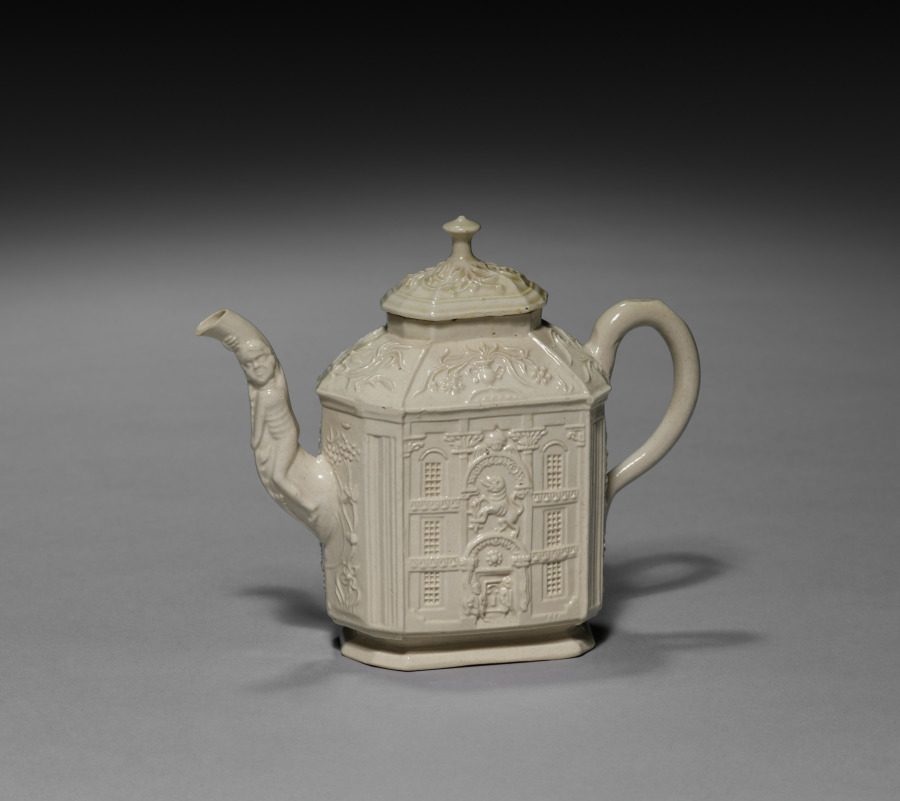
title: Teapot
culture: England, Staffordshire, 18th century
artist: Staffordshire Factory (British)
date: c. 1745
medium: salt-glaze earthenware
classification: Ceramic